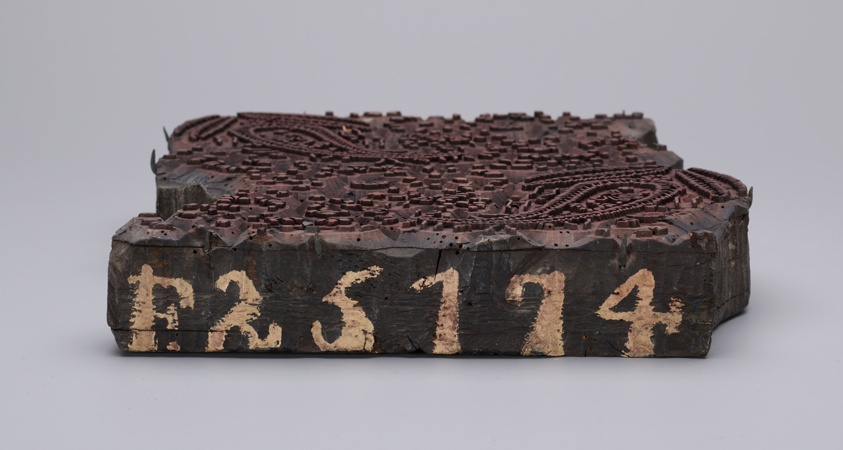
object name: Textile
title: Six Printing Blocks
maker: England or France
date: before 1850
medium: Carved wood, treated in a variety of techniques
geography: England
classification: printing blocks (printing surfaces); textile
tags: paisley